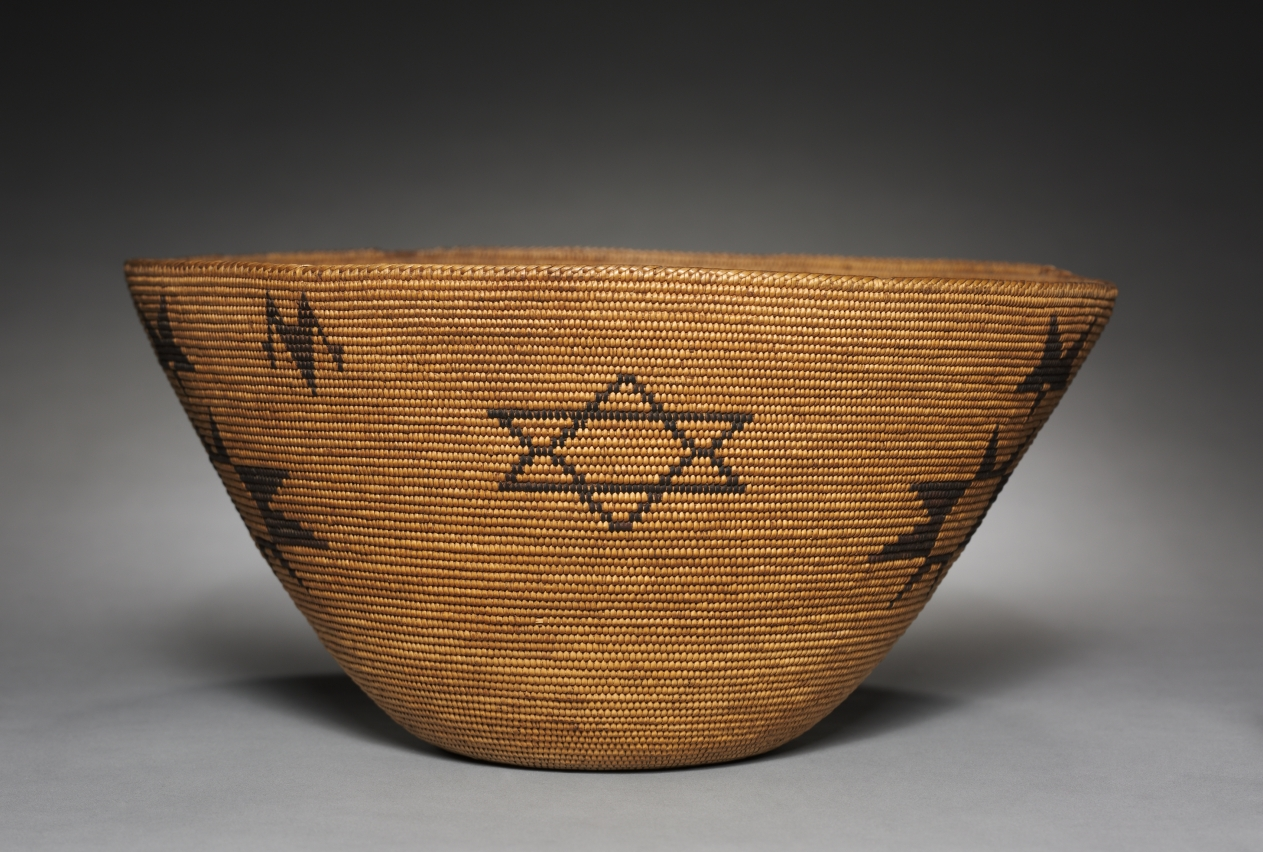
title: Cooking Bowl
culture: Great Basin, Washoe, late 19th- early 20th century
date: 1890s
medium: Willow, Bracken fern root; coiled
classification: Basketry